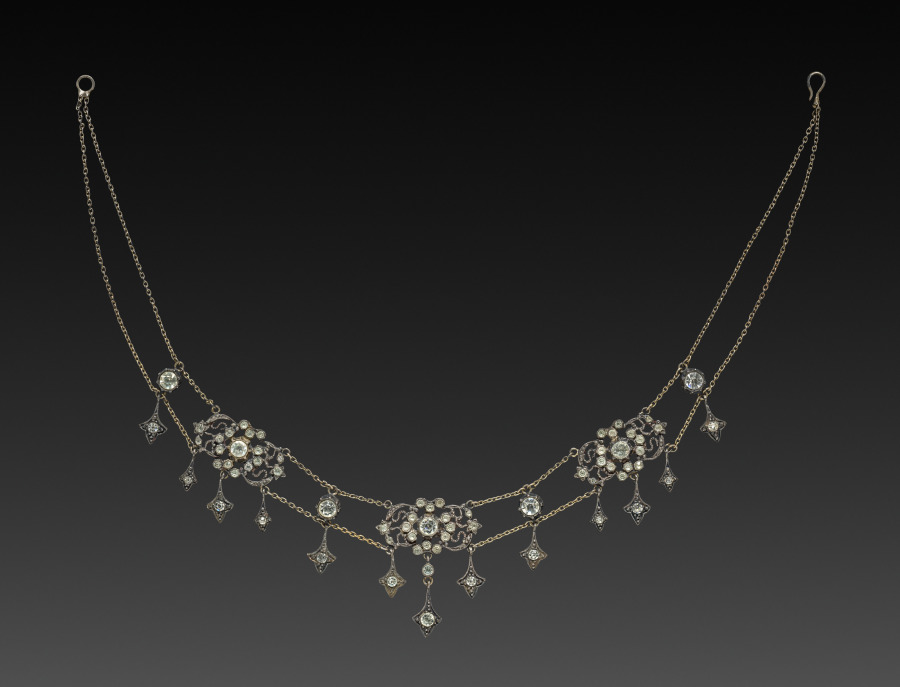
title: Necklace of Brilliants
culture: France, 18th century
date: 1700s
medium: brilliants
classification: Jewelry